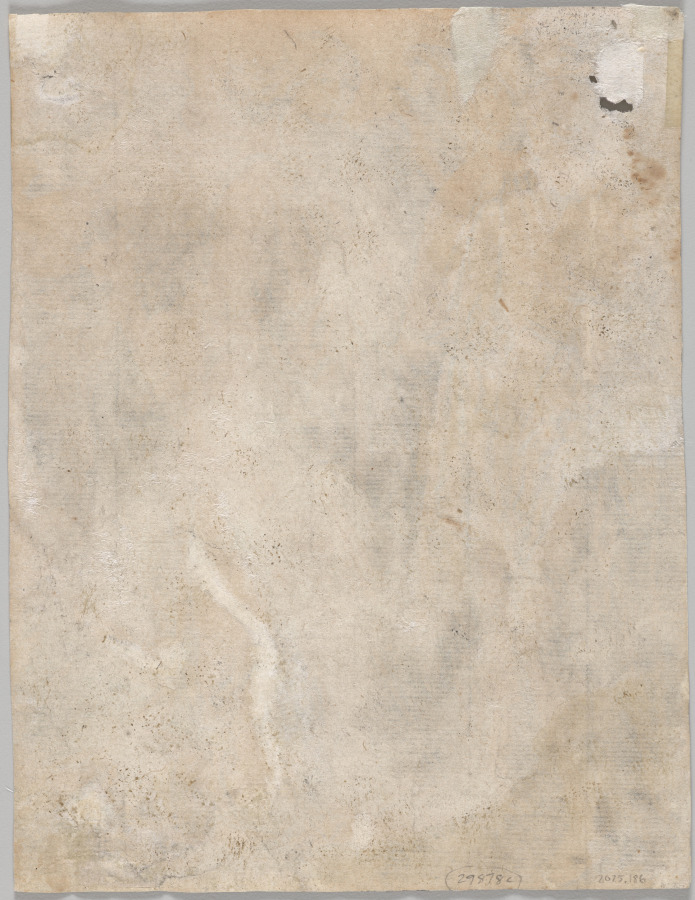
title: Abraham and the Angels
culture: Netherlands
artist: Lucas van Leyden (Netherlandish, 1494–about 1533)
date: 1513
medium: engraving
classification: Print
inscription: Engraving depicting Abraham and the Three Angels; Abraham, in profile facing to the left, kneels before three angels in front of him at left. Lettered with the letter “L” on rock formations behind Abraham to the right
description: Lucas van Leyden’s subject derives from Genesis 18, when Abraham met three angelic figures as they walked across the plains of Mamre. Abraham invited them to rest under a tree, seen in the left background, where he would later receive news from the Lord that his wife Sarah would bear a son. Van Leyden depicted Abraham kneeling before three standing figures and placed a walking stick in the hand of one of the angels to identify them as travelers. The compact composition and delicate textures, such as the angels’ wings, are typical of the artist's engraving technique.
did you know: Lucas van Leyden was an innovator in the medium of engraving, inventing new strategies for modeling shadow by cutting curved parallel lines and then adding shorter lines in between, as seen on the angel’s knee.